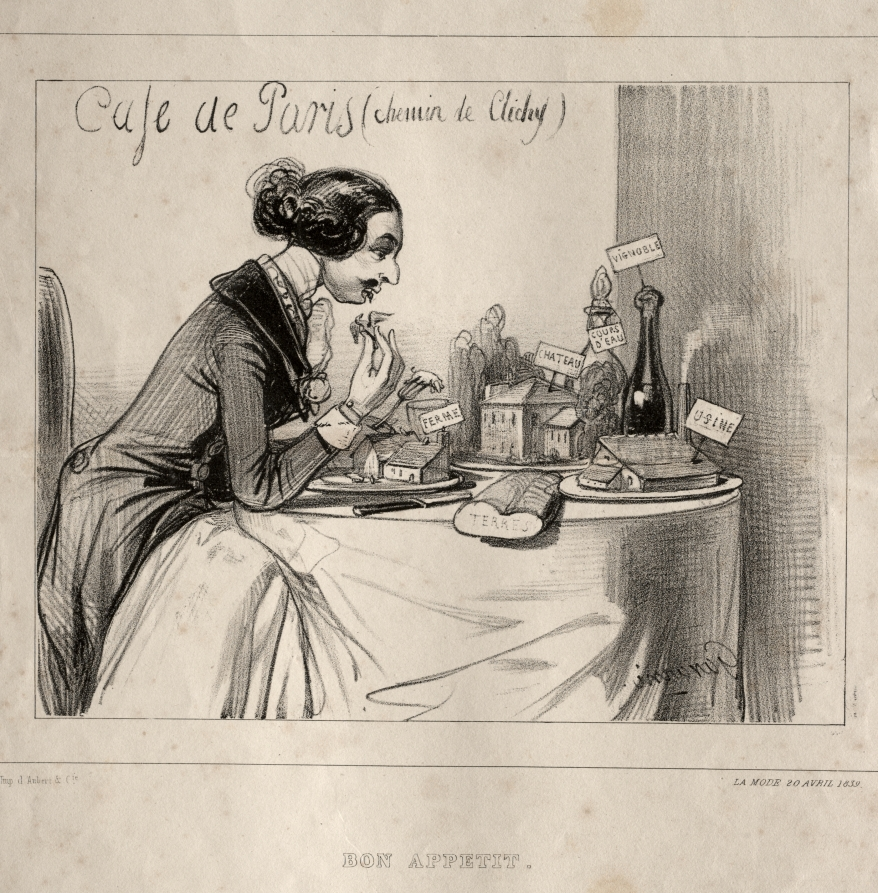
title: Croquis Fantastique: Bon Appetit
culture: France, 19th century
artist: Paul Gavarni (French, 1804–1866)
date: 1839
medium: lithograph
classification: Print